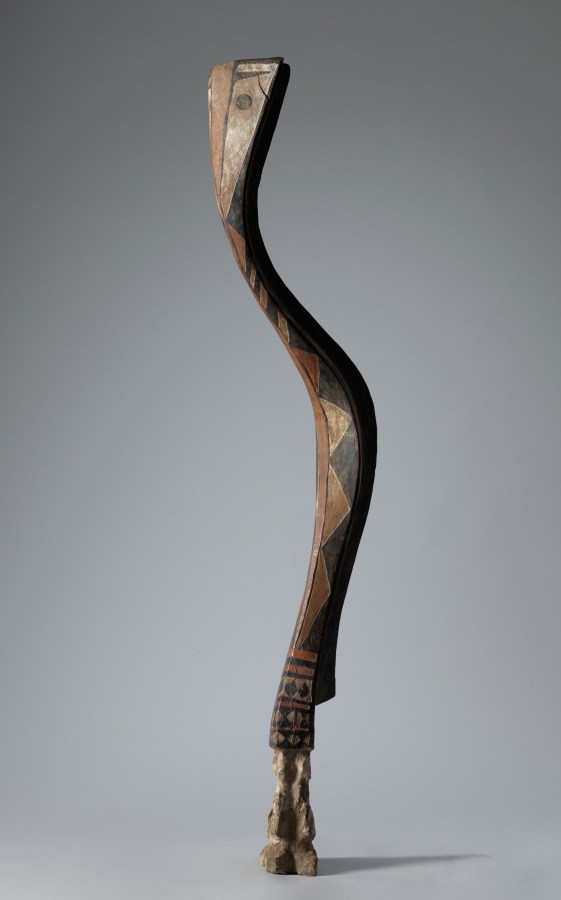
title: Serpent Headdress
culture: Africa, West Africa, Guinea, possibly Baga-style maker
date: late 1800s–early 1900s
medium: Wood (Nauclea pobeguinii) and paint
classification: Mask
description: Traditionally, Baga society was ruled by village councils of elders who derived their power from their direct contact with spirit entities through lifelong initiation rituals and the accumulation of secret knowledge. Two different religious orders controlled initiations, providing the context for much Baga art. One was identified as female, the other as male, though only men belonged to both groups. Initiations in each order followed three stages, culminating in the revelation of the highest spirit being. This type of Baga headdress embodied the serpent spirit Ninkinanka, honored for giving rain, bestowing riches, and bringing forth children. The serpent figure would be placed on top of a conical framework of palm branches carried on a male dancer’s head. It appeared at the end of the first level of the initiation for boys and girls or just before the circumcision at the beginning of the boys’ initiation.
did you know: In the context of boys' initiations, the serpent headdress was sometimes identified as the rainbow, which the Baga and their neighbors associate with beginnings and endings, life and death, and the continuation of lineages.